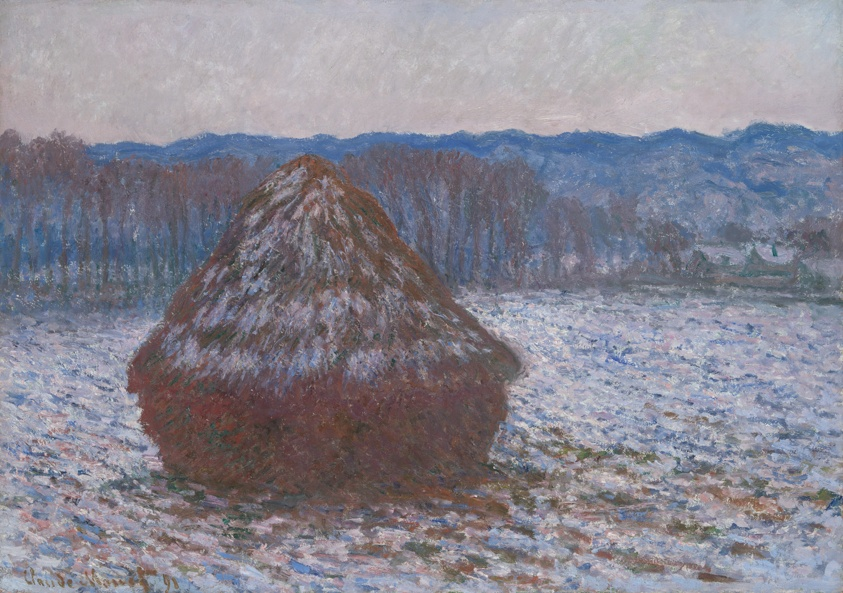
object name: Painting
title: Stack of Wheat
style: Impressionism, nineteenth century, 19th century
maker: Claude Monet (French, 1840–1926)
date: 1890–91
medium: Oil on canvas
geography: France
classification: oil on canvas; french; paint; oil paintings (visual works); painting; european painting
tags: wheat, trees, snow, rural life, nature, hills, farm, seasons, weather/seasons, landscapes